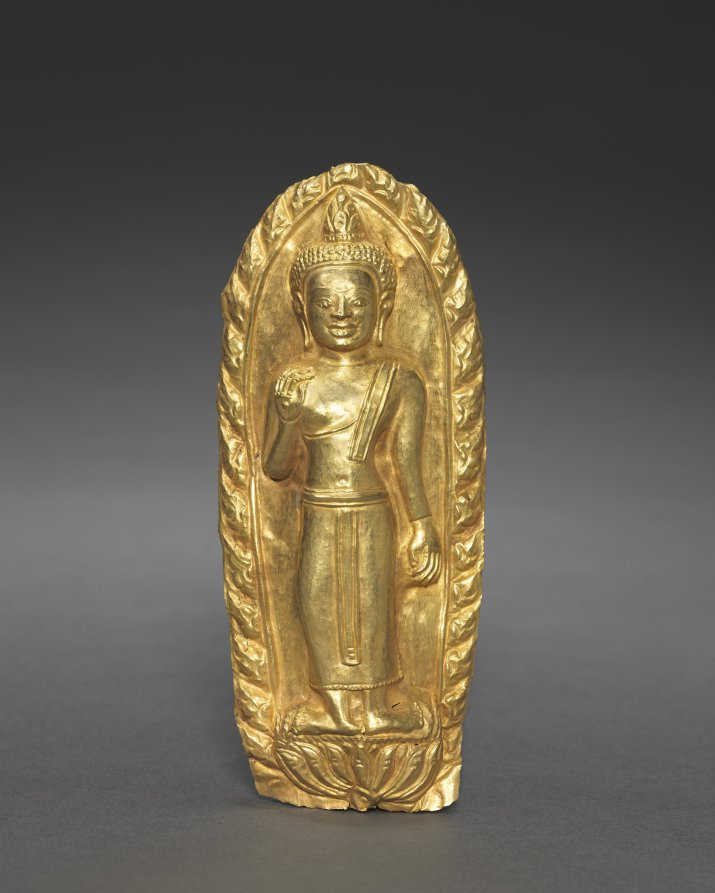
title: Standing Buddha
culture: Southern Myanmar (Burma), Pegu, or northwestern Thailand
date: 1100s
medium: gold repoussé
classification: Metalwork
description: Along with manuscripts, small-scale images of the Buddha could be commissioned by pilgrims or devotees and offered to a monastery in connection with a vow or the consecration of a sacred monument or object. The Buddha stands on a lotus flower that indicates his transcendence above ordinary beings. He is surrounded by flames that communicate his radiance and the intensity of the heat or power he acquired through meditation and discipline. His hands are in the mudra communicating the transmission of the teachings.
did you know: Pegu, the capital of the Mon empire, is on the south-central coast of Myanmar.